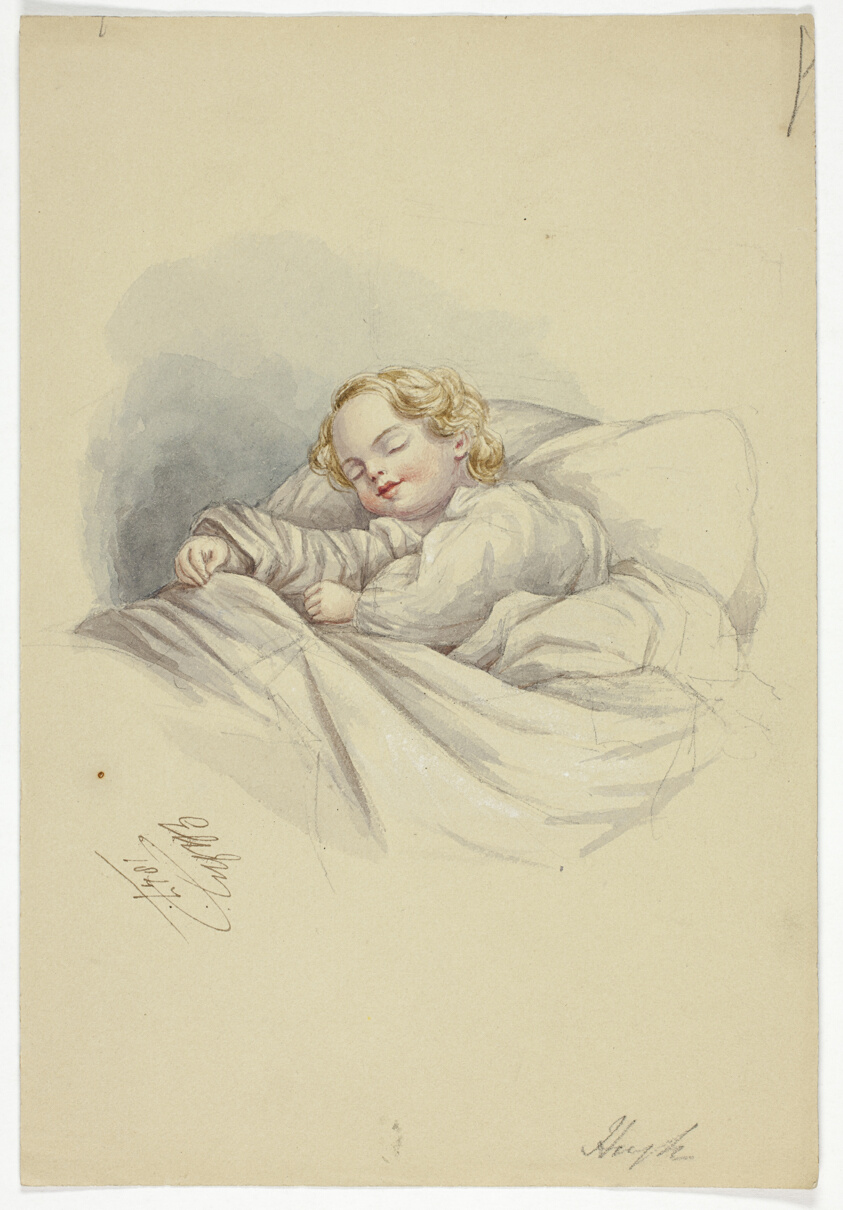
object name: Drawing and Watercolor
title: Hugh Sleeping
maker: Elizabeth Murray (English, c. 1815-1882)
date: 1847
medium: Watercolor with traces of white gouache over graphite on brown wove paper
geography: England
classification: watercolor; drawings (visual works); prints and drawing